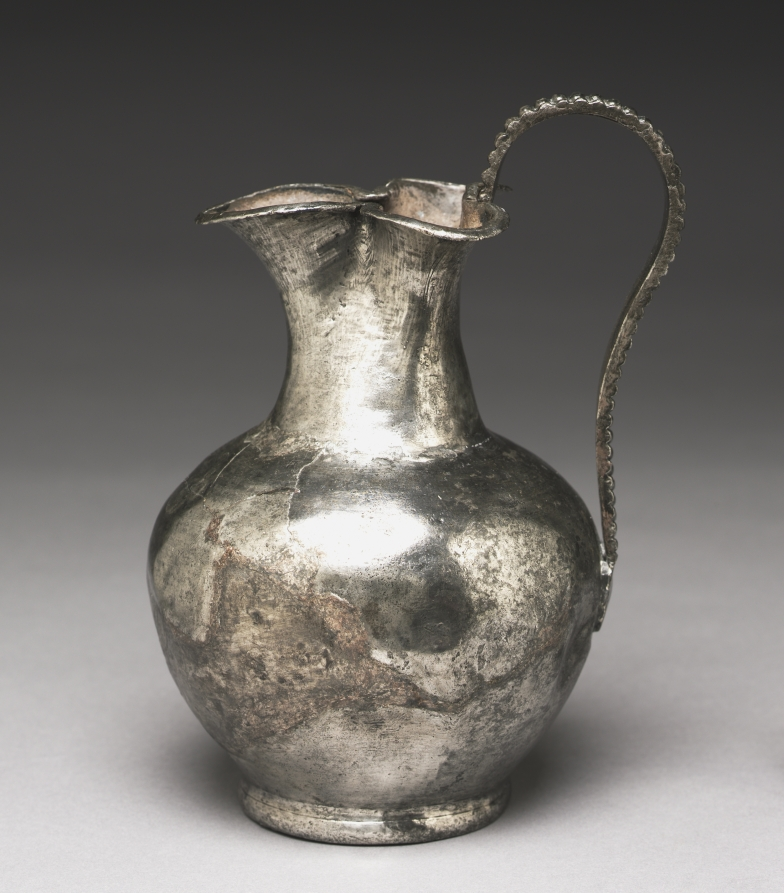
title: Ewer with a Trefoil (Three-Part) Spout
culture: Byzantium, Syria(?), Byzantine period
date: 300–600 CE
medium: silver with niello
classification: Metalwork